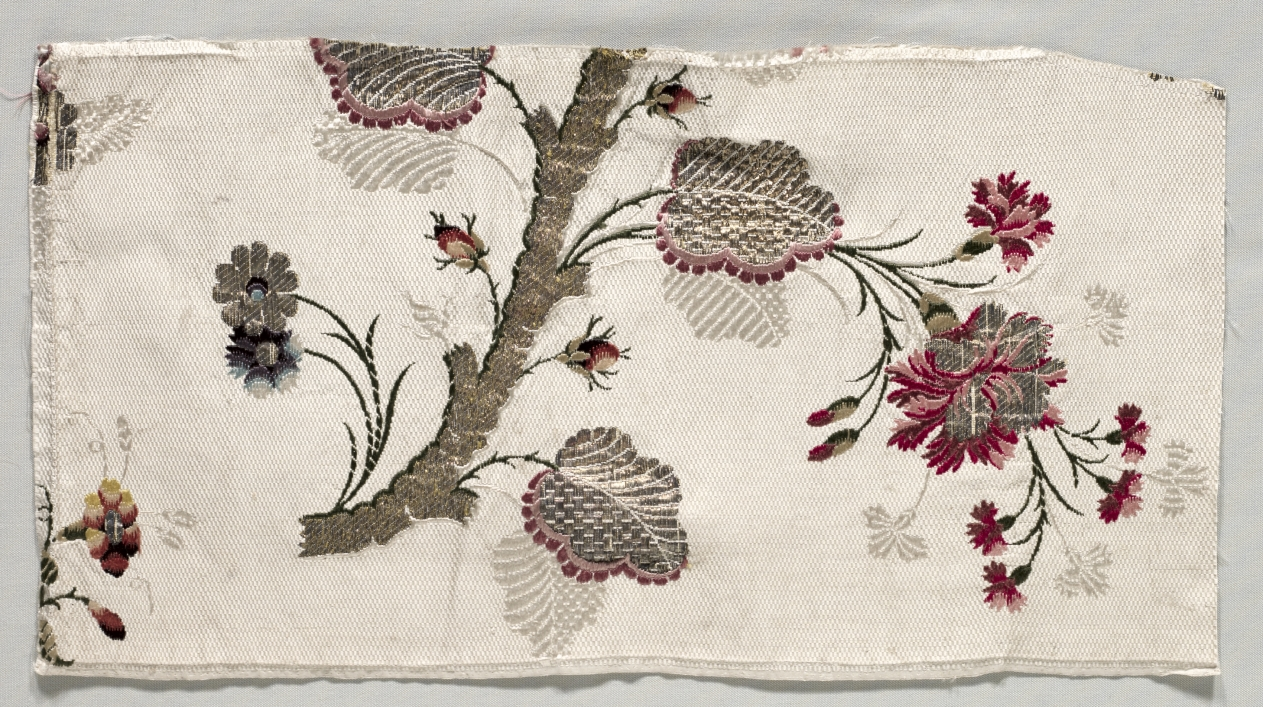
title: Textile Fragment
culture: Italy, 18th century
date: 1760–1780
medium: brocade (?); silk and metal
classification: Textile